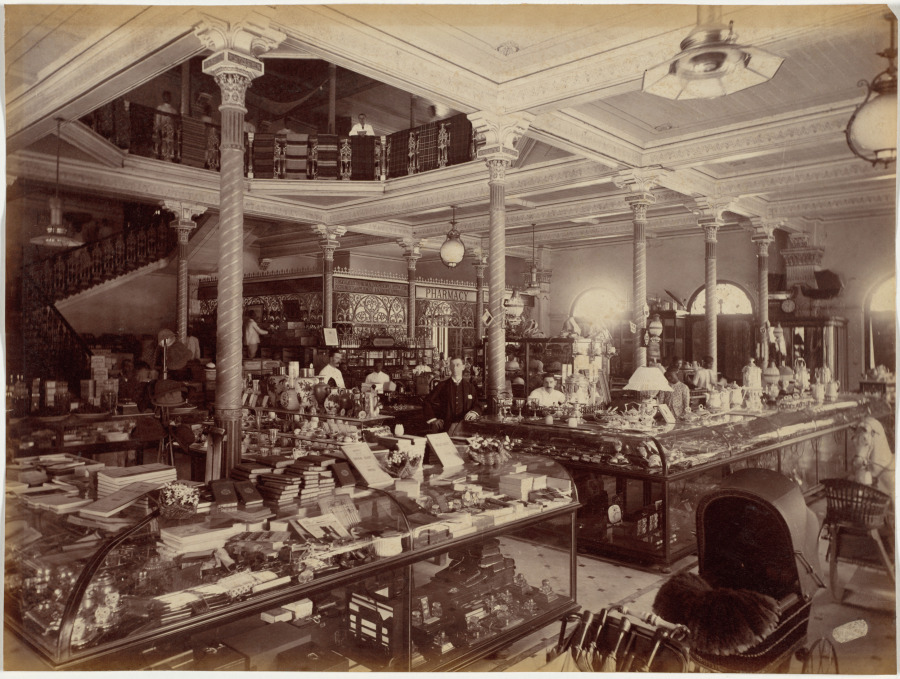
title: Treacher and Co.'s Shop in the Fort, Bombay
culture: India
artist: Raja Deen Dayal (Indian, 1844–1905)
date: 1886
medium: albumen print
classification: Photograph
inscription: Stamped in black ink on verso: “8.7B”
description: The English in India approximated life back home instead of adopting local ways. This image, probably one of Deen Dayal’s stock photographs, proved to those back in England that the comforts of home were readily available in India. Treacher’s, a multistory emporium in Bombay, offered a plethora of products ranging from drugs, wine, and electromedical instruments to silver tea sets and rocking horses. Many goods were imported, but some local craftsmen had mastered traditional European forms for objects including furniture and silver.